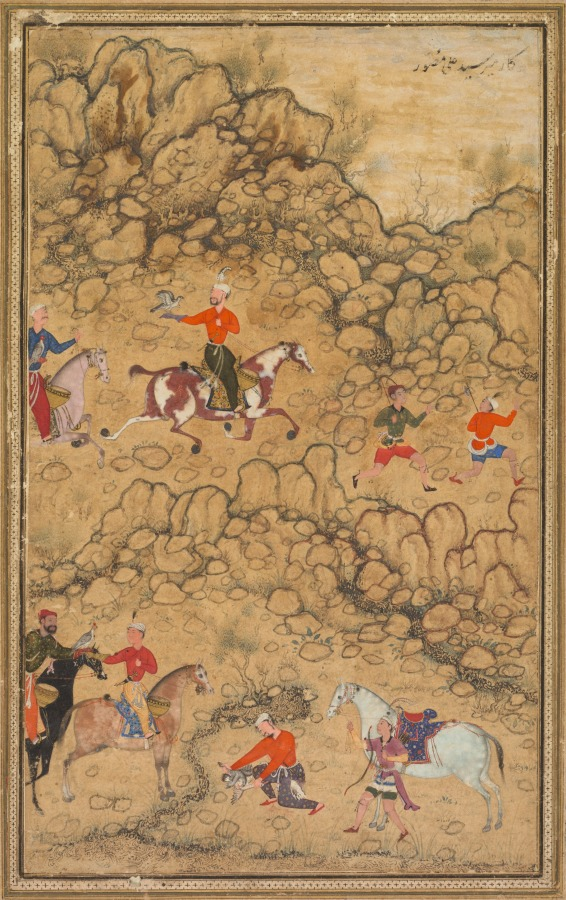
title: Hunting with falcons in a landscape; verso: Calligraphy of Chaghatai Turkish poems in praise of wine, Sultan Muhammad Nur (Persian, c. 1472–1536) and Mirza Muhammad (probably Persian, active c. 1520s)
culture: Mughal India, court of Akbar (reigned 1556–1605)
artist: attributed to Abd al-Samad (Persian, c. 1510–1600)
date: c. 1558–60; borders added probably 1700s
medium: Gum tempera, ink, and gold on paper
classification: Painting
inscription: Recto: Inscription in upper right in nasta‘liq script, probably during the 1700s: the work of Mir Sayyid Ali, the illustrator;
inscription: Verso: Persian inscription in central small rectangular panel below, in nasta‘liq script: Copied by Mirza Muhammad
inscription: Verso: Chaghatai quatrain in center, in nasta‘liq script: The wine has made an attempt on my life,/ Since it is the wine that can wear down the pain of separation./ O Sufi! Let the mosque be for you, and the tavern for me,/ Since you need to arrive at the Spring of Kowsar, while I am in need of wine!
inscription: Verso: Persian signature in lower left triangular panel: The humble Sultan Muhammad Nur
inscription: Verso: Chaghatai verses in margins, in nasta‘liq script: Since many obscurities have become clear to you,/ So make it clear that you can put up with my secret pain./ Compassion is the cure for my wounds/ O beloved! O darling! O beauty!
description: The Mughals hunted on horseback with falcons. The hunting party would ride out into the wild and flush the prey. Then, its hood removed, the falcon would chase the prey and bring it down. From childhood Akbar loved hunting, and this painting may be a rare depiction of Akbar as a youth at the lower left, with the black feather in his white turban. The falcon that has caught a duck has been hooded and is being passed between the young man and his bearded companion. This important work was painted by one of the Persian artists Akbar’s father brought to India from Iran. The inscription at the upper right gives the name of one of the other Persian artists, but it is probably an erroneous later addition. This page of delicately illuminated calligraphy from the pre-Mughal period was mounted into a Mughal album. The poems are written in the native language of the Mughals, a form of Turkish called Chaghatai, using a flowing form of Arabic script called nasta‘liq. The Mughals self-consciously adopted Persian as their official court language, so few Chaghatai books or works of calligraphy were made for them. The quatrain in the center reads: The wine has made an attempt on my life, Since it is the wine that can wear down the pain of separation. O Sufi! Let the mosque be for you, and the tavern for me, Since you need to arrive at the Spring of Kowsar, while I am in need of wine! The Spring of Kowsar is where the righteous quench their thirst in the afterlife.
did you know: The hunter’s glove is on the ground, as he pulls his falcon off the duck.